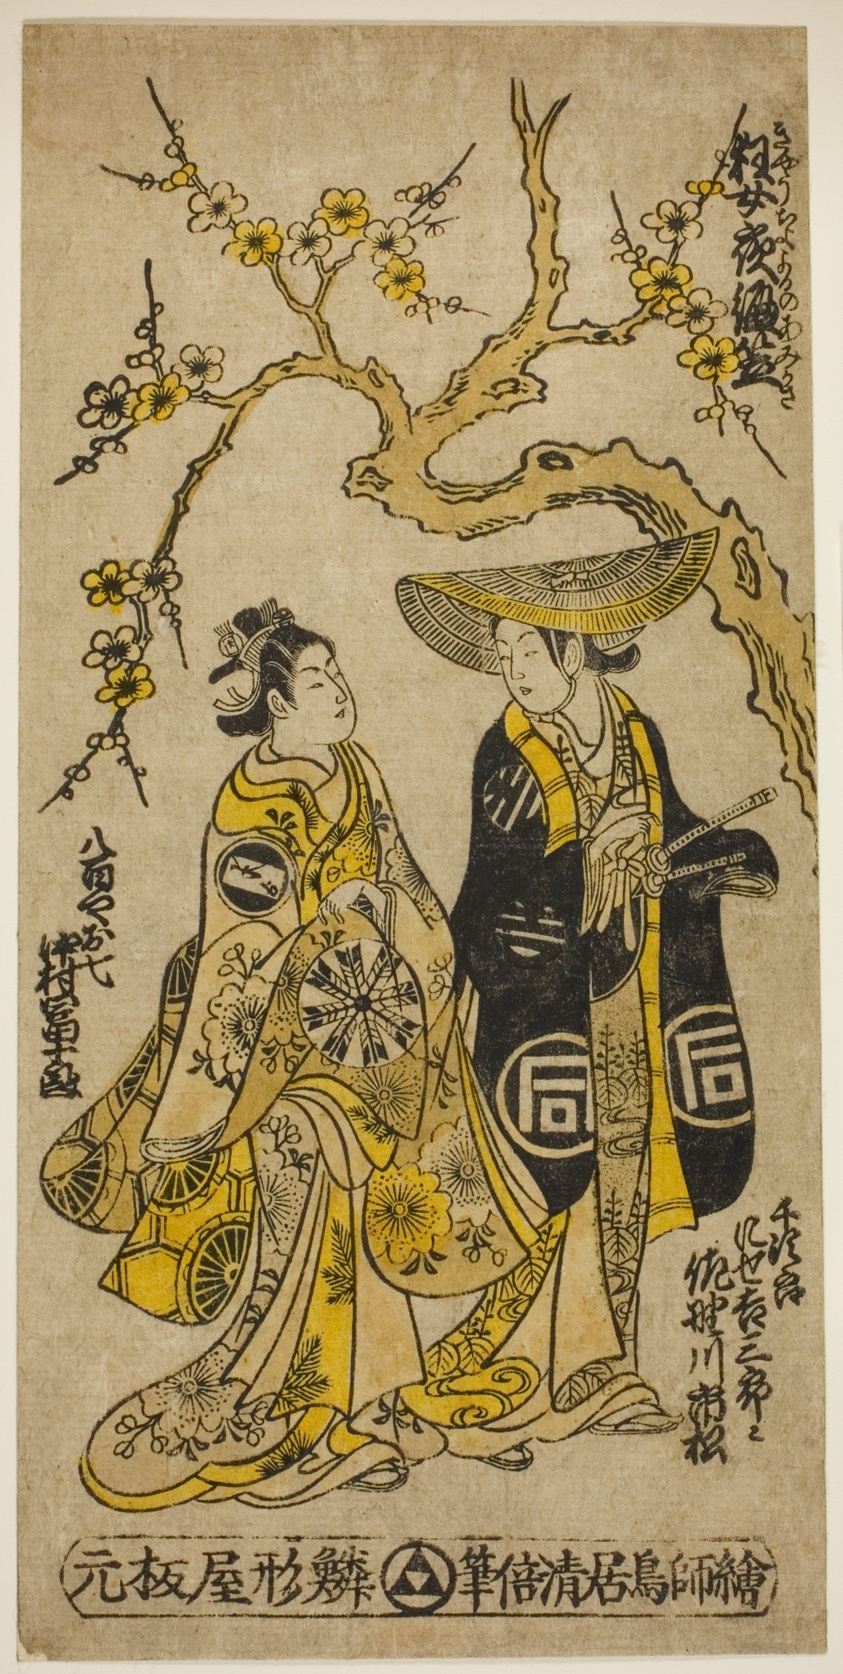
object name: Print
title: The Actors Sanogawa Ichimatsu I as Senjiro disguised as Kichisaburo and Nakamura Tomijuro I as Oshichi in the joruri "Midaregami Yoru no Amigasa," performed at the Nakamura Theater in the first month, 1742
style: Japanese (culture or style)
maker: Torii Kiyomasu II (Japanese, 1706 (?)–1763 (?))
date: 1742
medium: Hand-colored woodblock print; hosoban, urushi-e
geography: Japan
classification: woodblock print; print; asian art